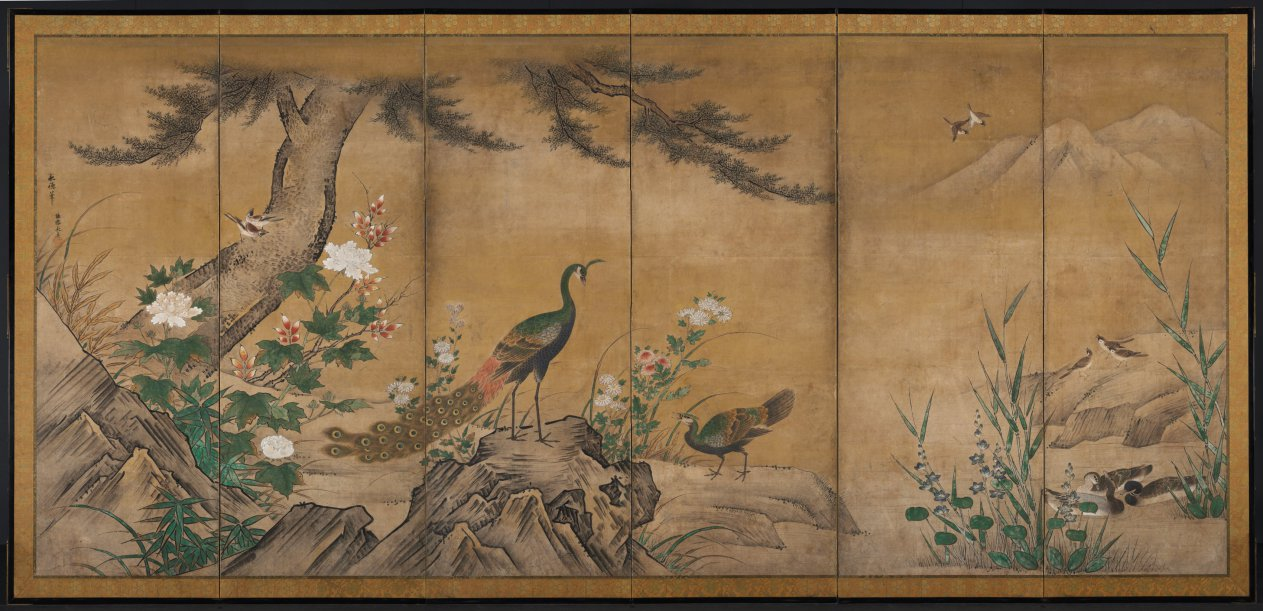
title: Birds and Flowers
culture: Japan, Momoyama period (1573–1615)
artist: attributed to Kano Mitsunobu (Japanese, 1565–1608)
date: late 1500s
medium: One of a pair of six-panel folding screens; ink, color, and gold on paper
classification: Painting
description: The landscape depicted in this pair of screens follows a seasonal progression from right to left, starting with the blossoming plum of early spring and ending with late autumn peonies. A variety of smaller birds are positioned throughout the scene, and a trio of swimming ducks is bracketed by early summer irises and early autumn bellflowers at the center. While some raptors (birds of prey) terrorize a pheasant and an egret (a waterfowl) to the right, a peacock and peahen converse to the left. Hawks are associated with military prowess, while the peafowl suggest cultural prestige.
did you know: As masters of the Kano academic painting style, both Kano Shōei and Kano Mitsunobu favored Chinese-inspired subject matter, such as birds and flowers.